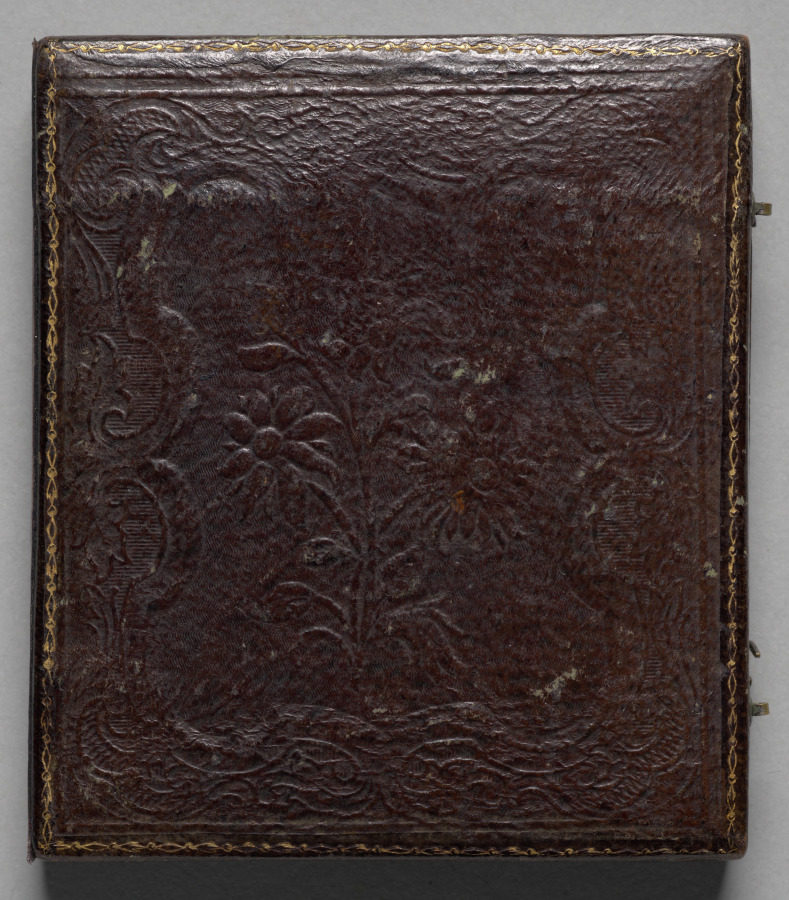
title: Magician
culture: America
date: c. 1850–55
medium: daguerreotype, sixth plate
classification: Photograph